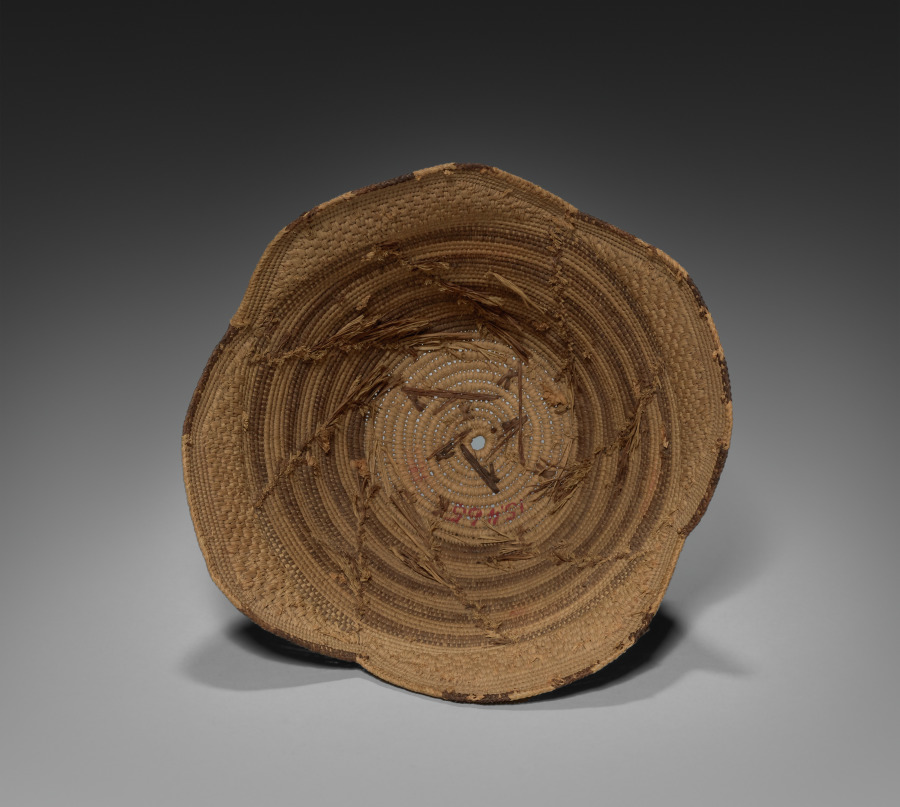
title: Hat (laket)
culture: Africa, Central Africa, Democratic Republic of the Congo, Kuba-style maker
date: early 1900s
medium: Raffia and dye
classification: Garment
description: Titled Kuba men and prominent women wear the laket, a small ornate dome-shaped hat. An essential fashion item of adult men in good social standing, it focuses special attention on the head as a significant marker of individual identity, ethnic affiliation, status, and role in society. This prestige object is secured on the crown of the head with a nine-and-a-half-inch metal pin that pierces through the hat onto a clump of hair. The laket is made from raffia palm fiber coiled into threads and woven in two alternating patterns and contrasting light and dark (dyed) wefts. There are two examples of the laket: the plain type with the flat top, and the more elaborate type called the laket mishiing.